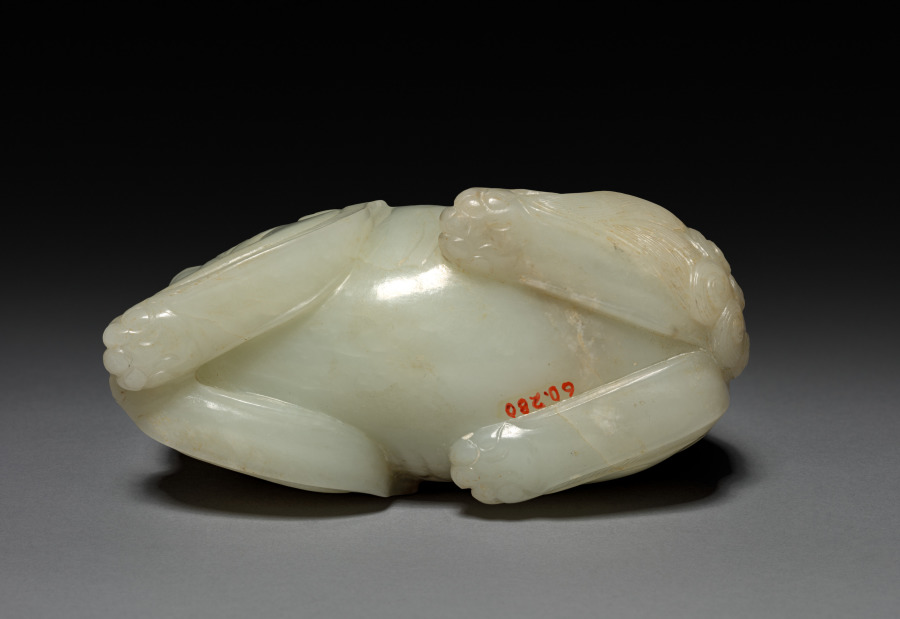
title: Fantastic Animal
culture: China, Qing dynasty (1644-1911)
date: 1700s–1800s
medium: jade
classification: Jade